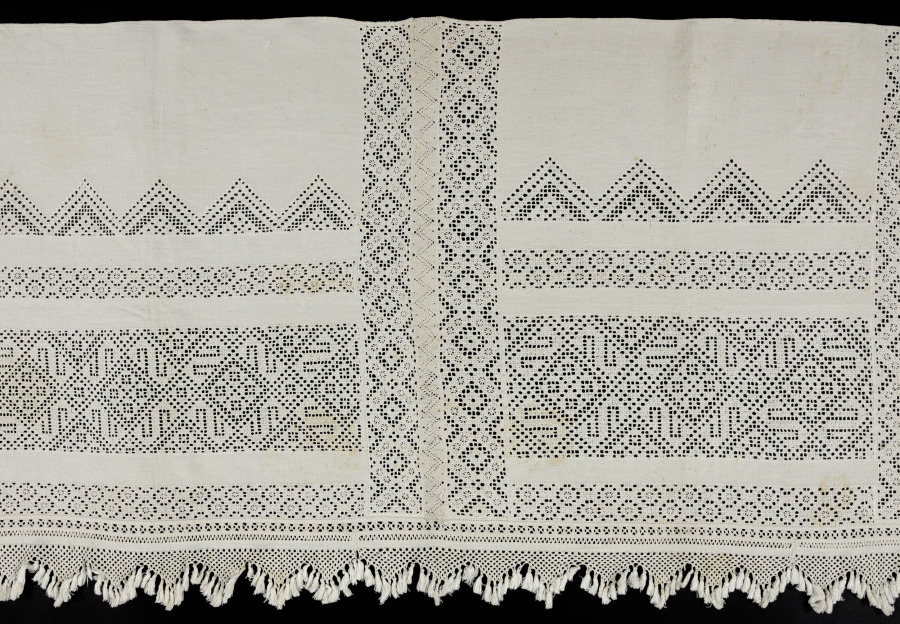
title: Lace Sheet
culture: Italy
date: 1600s–1700s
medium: Linen: needle lace (drawnwork) and knotted lace and fringe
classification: Lace